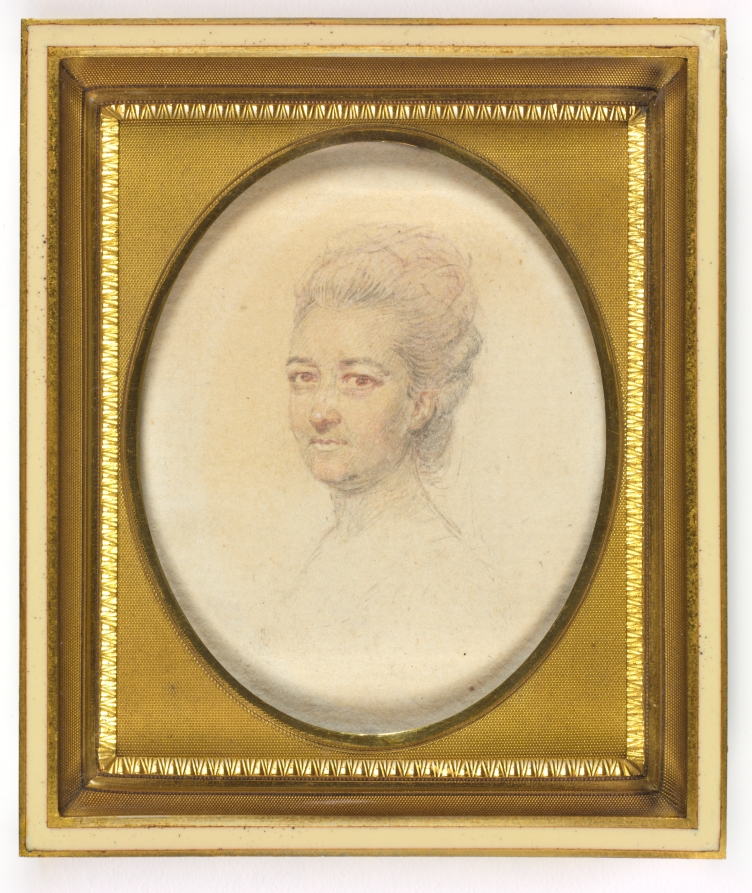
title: Portrait of a Woman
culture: England, 18th century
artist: John I Smart (British, 1741–1811)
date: c. 1775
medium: graphite and wash on laid paper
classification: Portrait Miniature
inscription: inscribed on paper backing in graphite, upside down, at upper right: 139; also on paper backing in graphite on slant at lower right corner: La belle/Gabrielle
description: Although it is impossible to say if it was always part of the artist’s process to execute a preparatory sketch prior to painting each miniature, we do know that John Smart retained many hundreds of these sketches. A group of preparatory sketches—of which this portrait is one—descended through the Smirke family after Smart’s daughter Sarah gave a sketchbook containing preparatory portrait studies to her friend Mary Smirke, sister of the celebrated Victorian architect Sydney Smirke. This book was probably broken up around 1877 when it was divided between Sydney’s daughters Mary Jemmett and Mrs. Lange, whose portions were both sold at auction in 1928. This portrait was assigned the historically colorful but fictitious title of “La Belle Gabrielle” at some point after memory of its true identity had been lost. Giving illustrious titles to portraits of unknown sitters was a popular strategy adopted by dealers during the nineteenth and twentieth centuries, often applied to miniature portraits and, in particular, to Smart’s sketches of women. The inscription on the paper backing is not in Smart’s hand, and when the paper backing was removed in 1993, no inscriptions were discovered on the back of the drawing itself. Only the sitter’s head and neck are drawn, and a low-necked dress is faintly suggested. Her head is turned to the right, and her light-colored hair is dressed high, with flat curls against the back of her head. She has brown eyes, and the color of her lips is extremely faded, though the hint of a ruddy complexion remains. Her sagging jaw line and the lines beneath her eyes suggest that this sitter was painted as a mature woman. The background is unpainted. To this date, the finished ivory for which this preparatory sketch was presumably undertaken has not been discovered.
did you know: Sketches helped John Smart work out the particulars of a portrait before commencing the miniature on ivory; they were useful in the event that a duplicate might later be required.